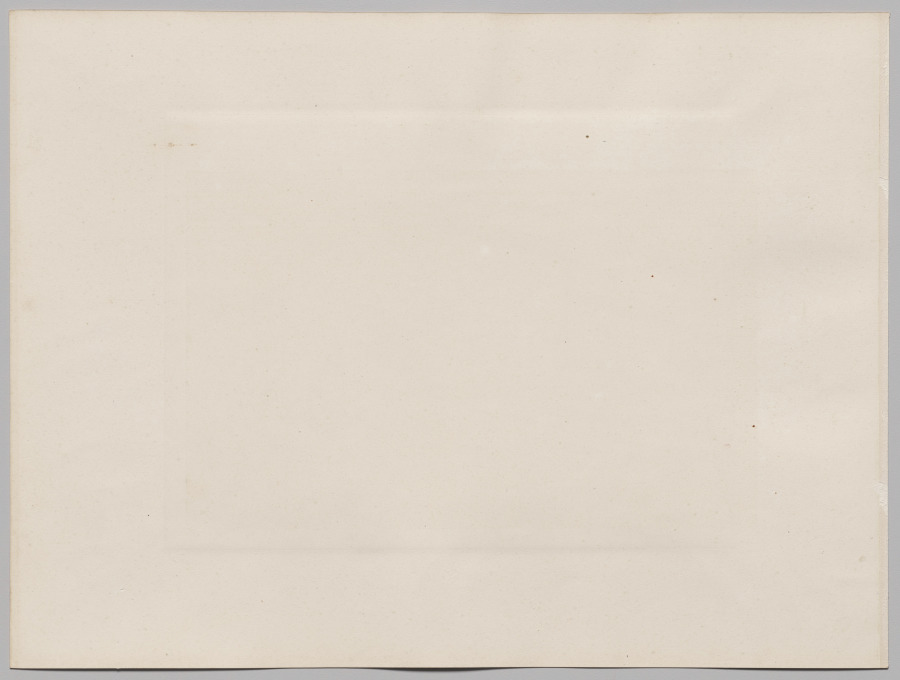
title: Arc de Triomphe de l'Etoile, Paris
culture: France, 19th century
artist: Édouard Baldus (French, 1813–1889)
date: c. 1860s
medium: albumen print from collodion negative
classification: Photograph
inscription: Imprinted in black on recto of mount: “40”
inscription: Written in black ink on recto of mount: “E. Baldus”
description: The construction materials seen here in the foreground symbolize the fact that for three decades starting in 1854, Paris was a construction site as Baron Haussmann replaced the crooked streets and crumbling buildings of medieval Paris with a modern city. Its rational city plan featured broad avenues that radiated from key sites like the Arc de Triomphe.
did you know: Completed in 1836, the Arc is dedicated to the armies of the French Revolution and the Second Empire and has gained additional symbolic force with each war fought by the French.